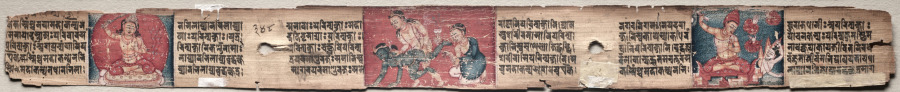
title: Bodhisattva Samantabhadra purifies the path to enlightenment, with Manjushri, folio 348 (verso) from a Gandavyuha-sutra (Scripture of the Supreme Array)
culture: Nepal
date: 1000–1100s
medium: gum tempera and ink on palm leaf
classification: Painting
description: The painting in the center shows a righteous bodhisattva tossing aside a blue-skinned heretic, while an impious blue-clad monk sits behind them, the next to be overpowered by the righteous one. In the painting on the left, the Bodhisattva of Wisdom, Manjushri, brandishes his sword, and at the far right, a Buddhist priest (Vajracharya) sets fire to a Hindu sage in a rocky landscape.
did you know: Blue-clad monks were said to visit prostitutes, drink liquor, and practice extreme tantric rituals.